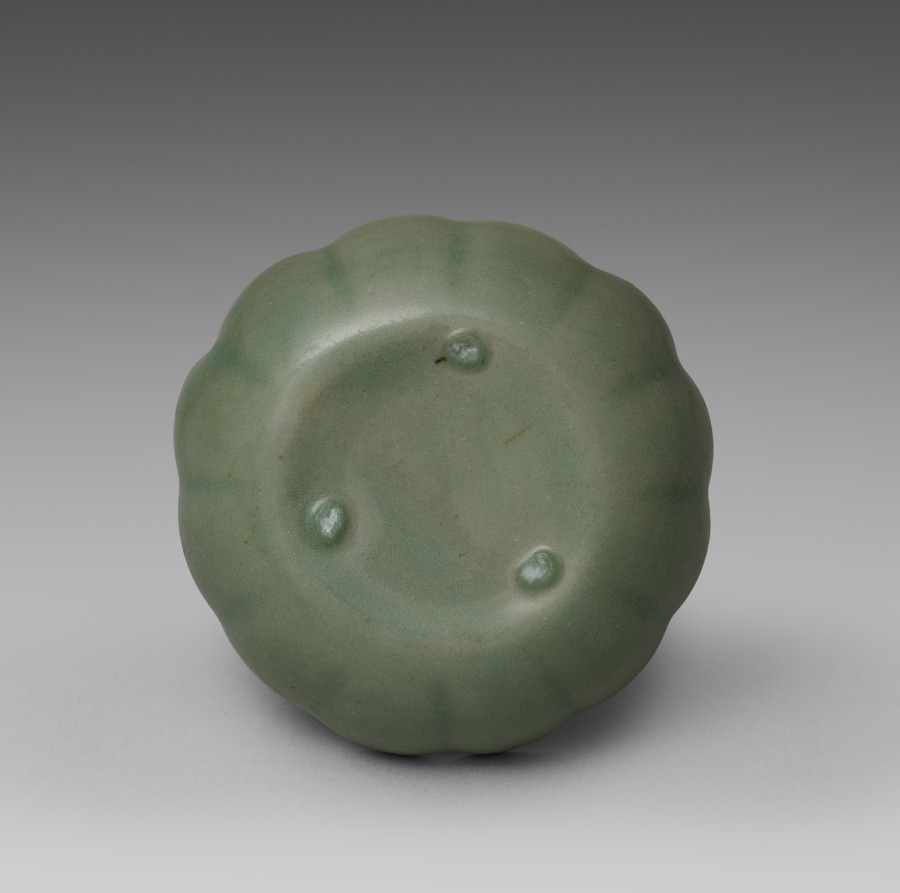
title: Celadon Dish with Molded Phoenix Design in the Shape of a Flower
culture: Korea, Goryeo dynasty (918–1392)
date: 1200s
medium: Celadon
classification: Ceramic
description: Celadon wares intended for everyday use—such as this dish—were among the most common burial objects placed in tombs during the Goryeo period (918–1392). Furnishing tombs with elaborate assemblages of objects was believed to honor the deceased and provide comfort in the afterlife. This dish, featuring the image of a flying phoenix, was likely a cherished possession that accompanied its owner to their final resting place.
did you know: The phoenix motif at the center of this dish symbolizes cosmic harmony and prosperity in traditional East Asian cultural and artistic expression.